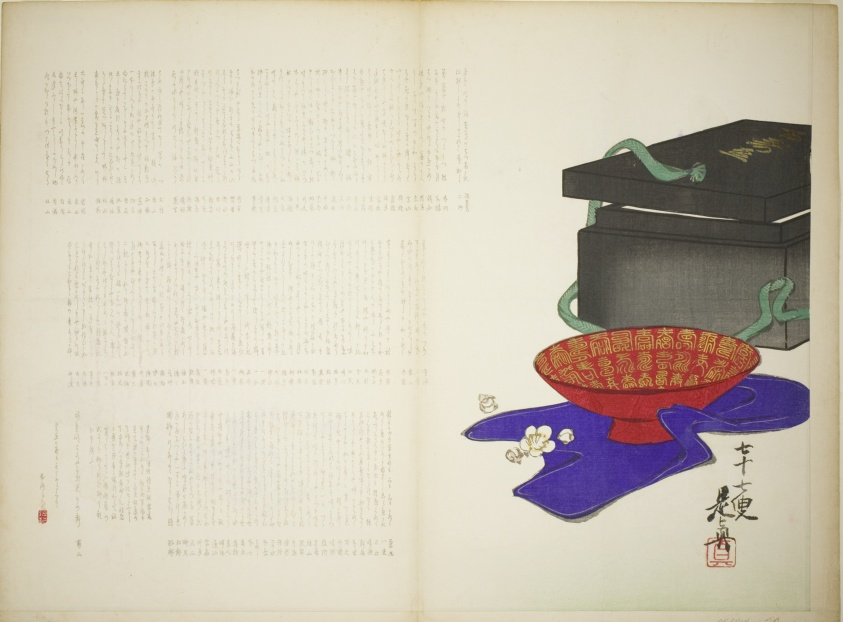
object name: Print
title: The Cup of Long Life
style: Japanese (culture or style)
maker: Shibata Zeshin (Japanese, 1807-1891)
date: spring 1883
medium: Color woodblock print; surimono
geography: Japan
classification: woodblock print; print; asian art